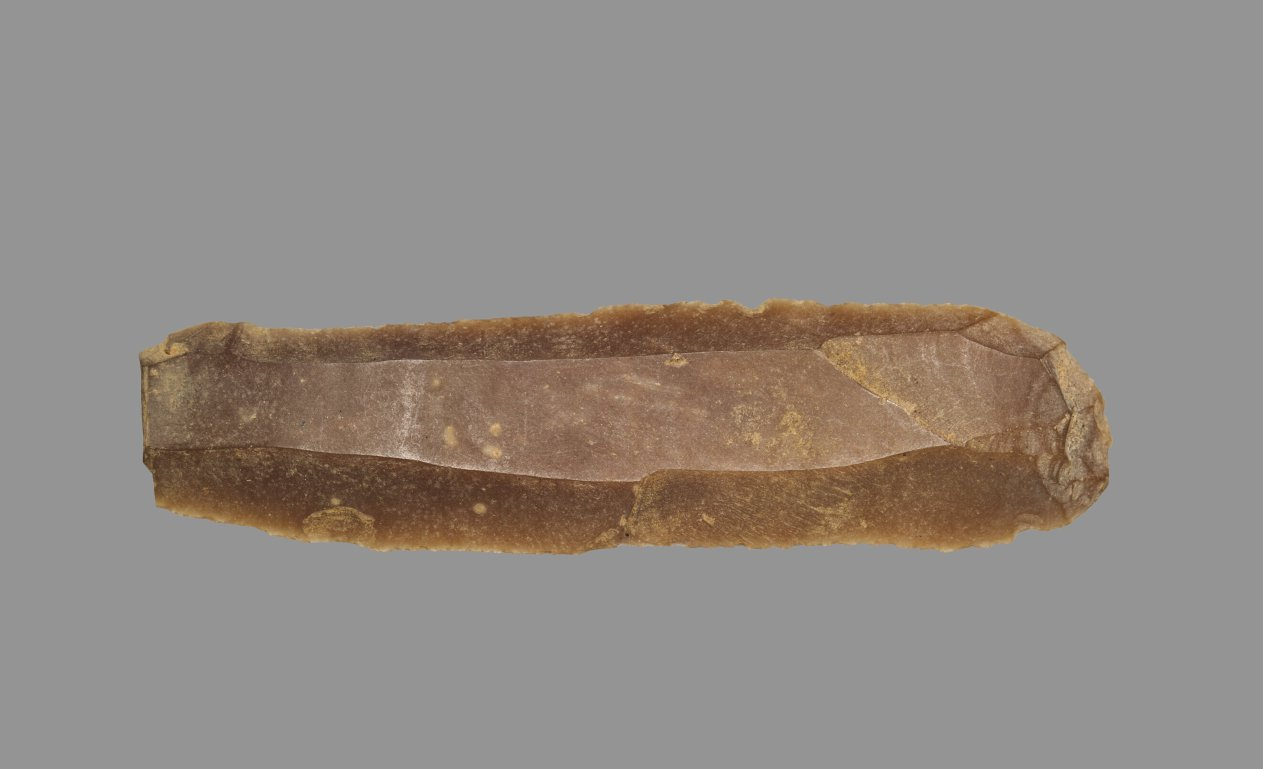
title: Sickle Blade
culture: Egypt, Middle Kingdom (2040–1648 BCE), Dynasty 12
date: 1980–1801 BCE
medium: flint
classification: Implements